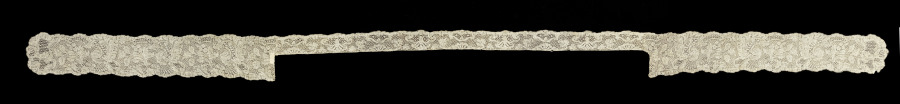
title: Lace Lappets and Edging for Cap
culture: Belgium, Binche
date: 1700s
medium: Linen: bobbin lace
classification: Lace